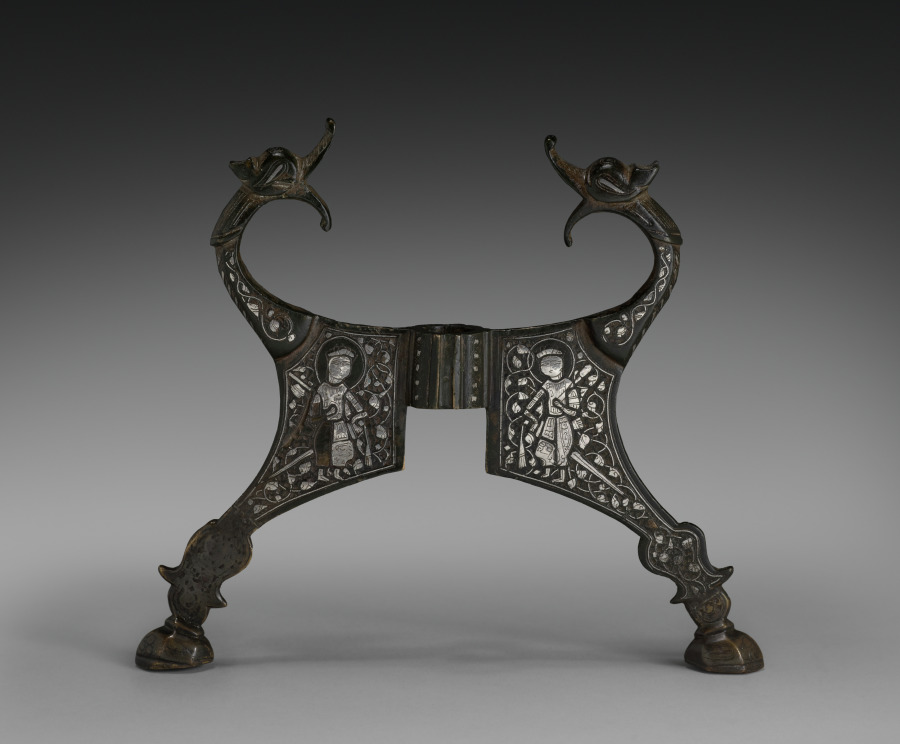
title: Dragon-headed Stand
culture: Northern Iraq or Syria, Zangid (1127–1251) or Ayyubid period (1171–1260)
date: 1200s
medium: Cast brass inlaid with silver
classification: Metalwork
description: Themes of hunting and combat are evoked by this stand with gaping dragon heads and figures armed with swords and spears.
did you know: Each hunter's head is surrounded by a nimbus.